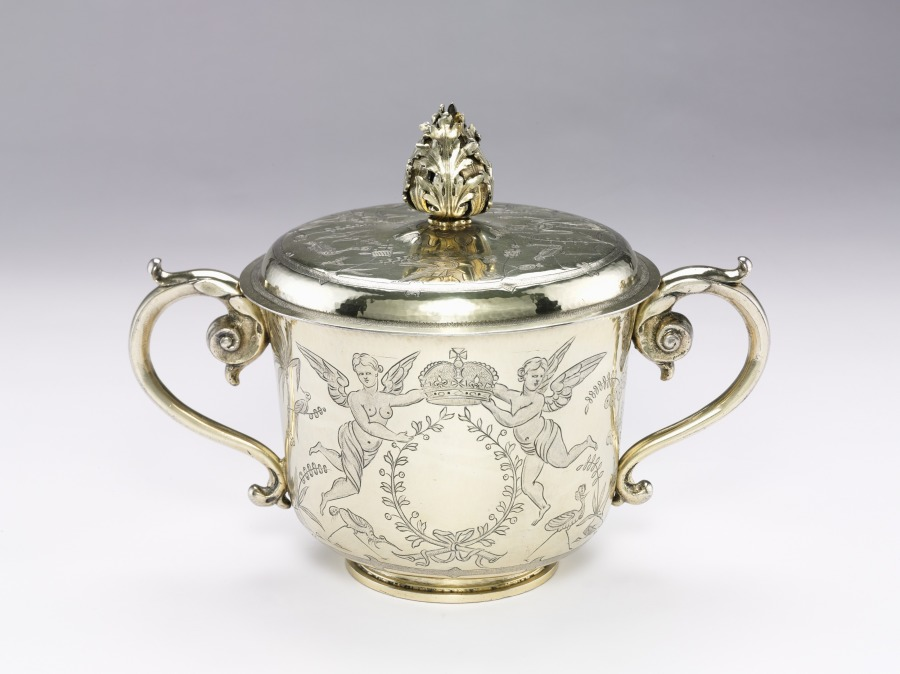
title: Two-Handled Cup and Cover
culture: England, London, 17th century (James II)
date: 1686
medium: silver gilt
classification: Silver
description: Produced a year after the coronation of James II (1633–1701), this silver cup celebrates the monarchy and reflects the political and social alliances that underpinned the aristocracy during the 1600s. During their coronation, James II and his second wife Mary of Modena (1658–1718) were carried through the city of London under a silk canopy adorned with motifs inspired by European perceptions of Chinese art, known as chinoiserie. Following the procession, the thirty-two lords involved in the ceremony were each offered a portion of the cloth from the canopy as well as sixteen troy ounces of silver from the posts. At least two of them commissioned cups adorned with chinoiserie to be made from the silver. While it is unclear if this cup once belonged to one of the thirty-two peers, it was almost certainly created in response to the same motifs and social developments.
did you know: The two female figures lift a crown on the front of this cup that closely resembles Saint Edward’s Crown, the heraldic emblem of the United Kingdom.